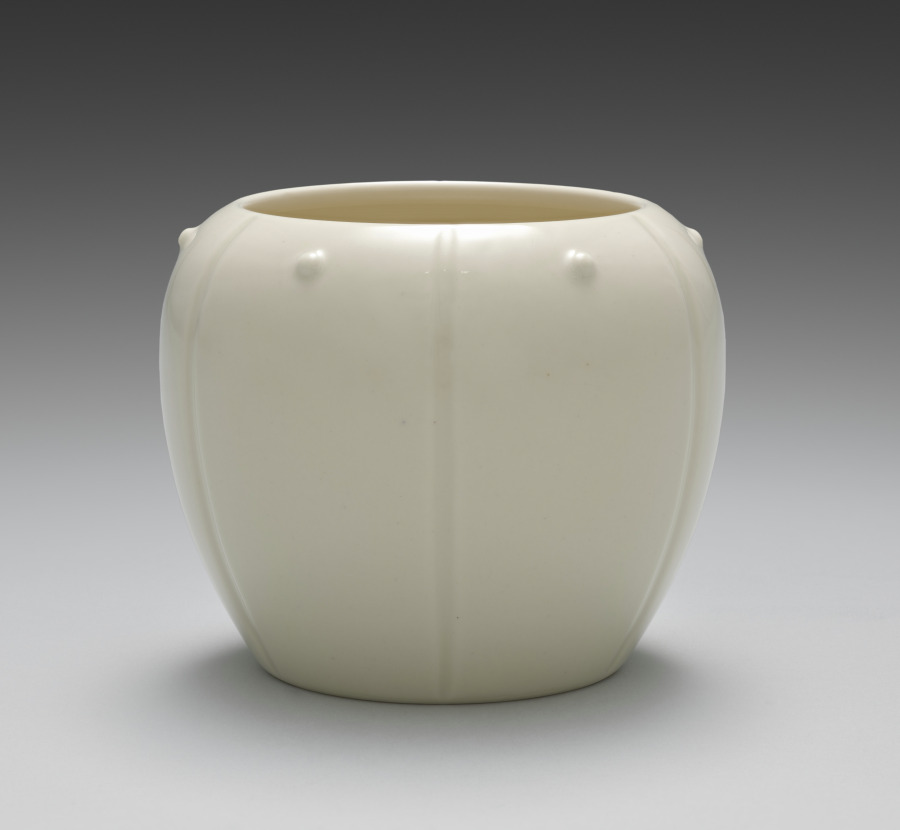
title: Container from Lit Charcoal and Ash Containers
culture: Japan, Meiji period (1868–1912)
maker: Seifū Yohei III (Japanese, 1851–1914)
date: 1893–1914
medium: One from a set of four containers; porcelain with molded design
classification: Ceramic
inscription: 清風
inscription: The storage box for this set is inscribed and impressed with seals.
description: The box lid for these six-lobed lit charcoal and ash containers, or hiire, identifies them as kōhakuji, another of Yohei III’s translucent cream colors over ivory clay bodies. One might translate the name as “lustrous pearl[–glazed ivory] porcelain.” A hiire was filled with ash with burnt coals at the center so that embers and tobacco ash could be discarded safely during a gathering. Each of the lobes on the containers has a round protrusion set below the rim. The studlike pattern is called ruiza. The term is also used to describe the pattern that rings the shoulder of some flower vases or metal kettles used in chanoyu.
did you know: The Seifu studio generally followed the standard practice in Japan for identifying the artist and object in box inscriptions.